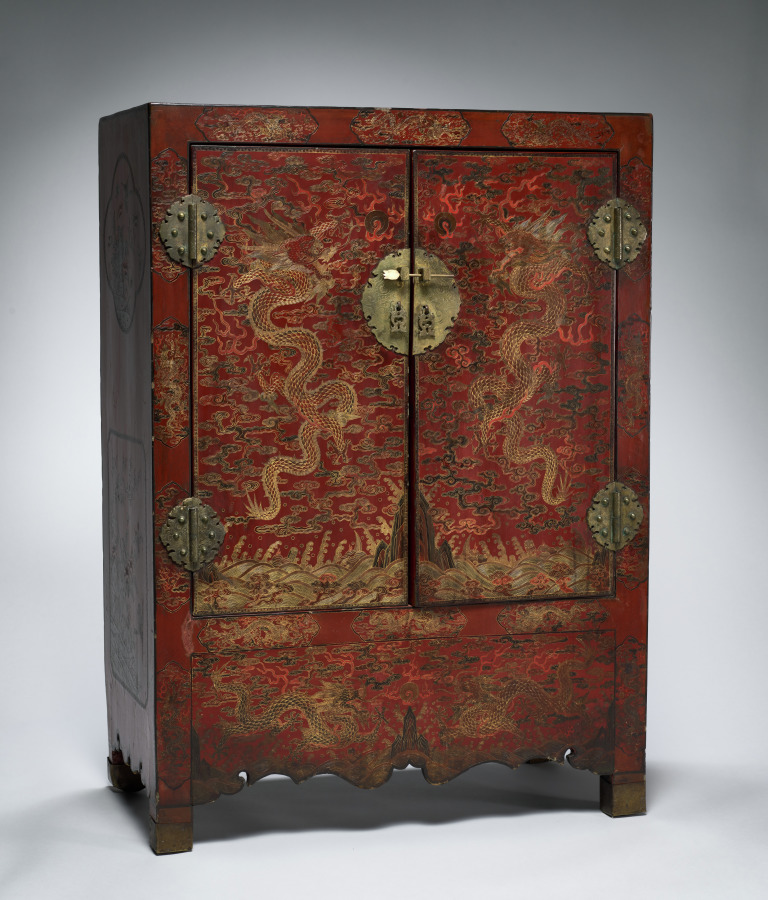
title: Double Cabinet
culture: China, Ming dynasty (1368-1644) - Qing dynasty (1644-1911)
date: 1600s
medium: red lacquer on wood with pigment and gilding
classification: Furniture and woodwork